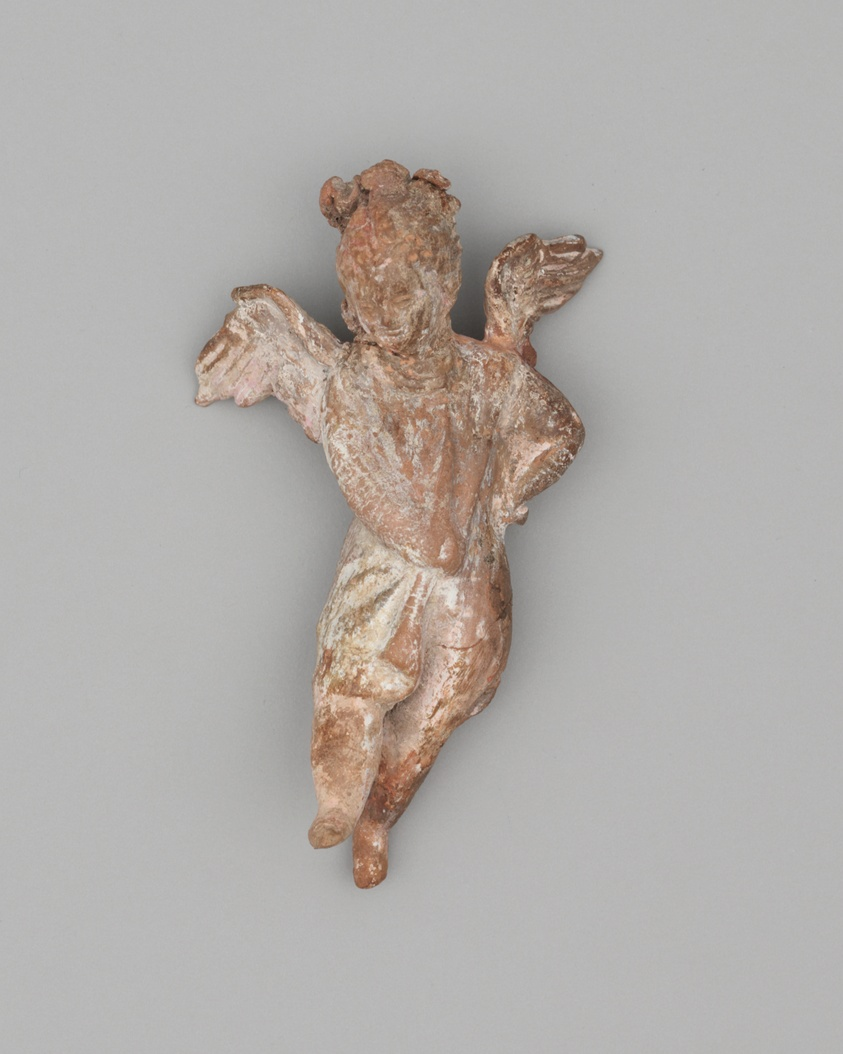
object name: Sculpture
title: Statuette of Eros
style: greek, ancient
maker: Greek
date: 3rd-2nd century BCE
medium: terracotta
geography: Greece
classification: earthenware; ceramics; sculpture; ancient art